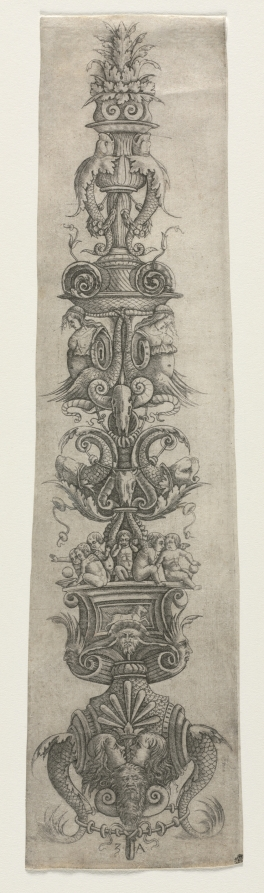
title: Upright Arabesque with Masks, Cupids and Nereids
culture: Italy, 15th century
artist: Giovanni Antonio da Brescia (Italian)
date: late 1400s–early 1500s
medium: engraving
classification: Print